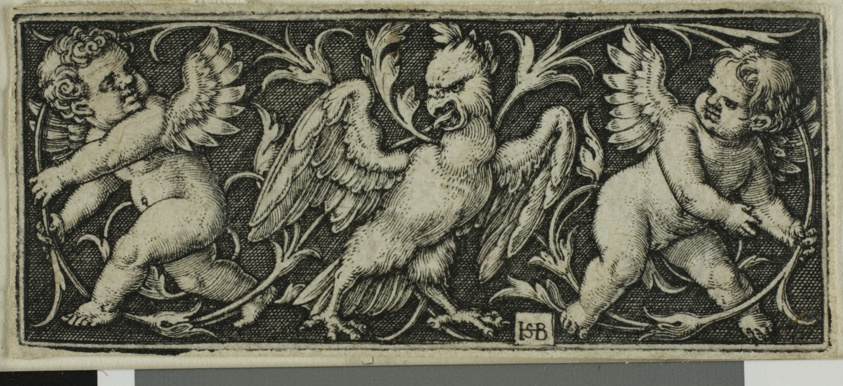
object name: Print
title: Ornament with an Eagle and Two Genii, from Four Vignettes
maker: Sebald Beham; German, 1500-1550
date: c. 1544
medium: Engraving in black on ivory laid paper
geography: Germany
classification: engraving; print; prints and drawing